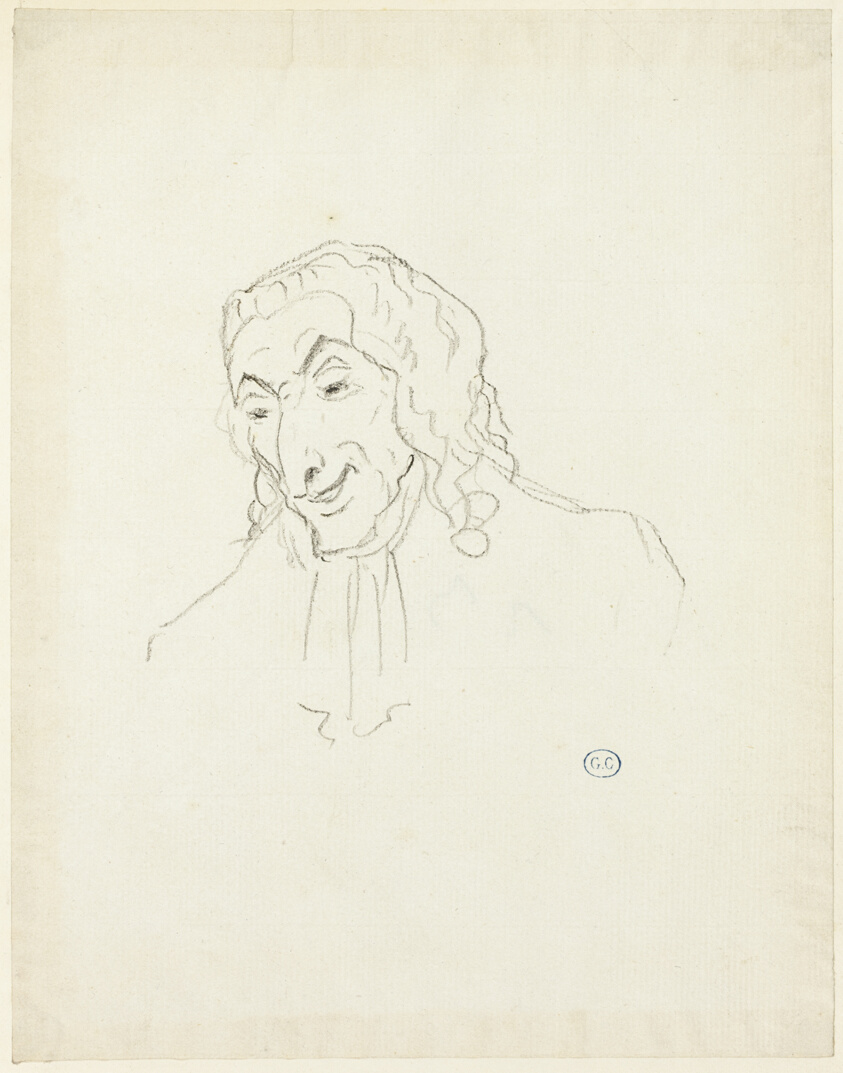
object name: Drawing and Watercolor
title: Bust of a Man with a Jabot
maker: Jacques-Louis David; French, 1748-1825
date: c. 1810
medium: Black crayon, on off-white laid paper, edge mounted on cream wove paper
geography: France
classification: drawings (visual works); prints and drawing